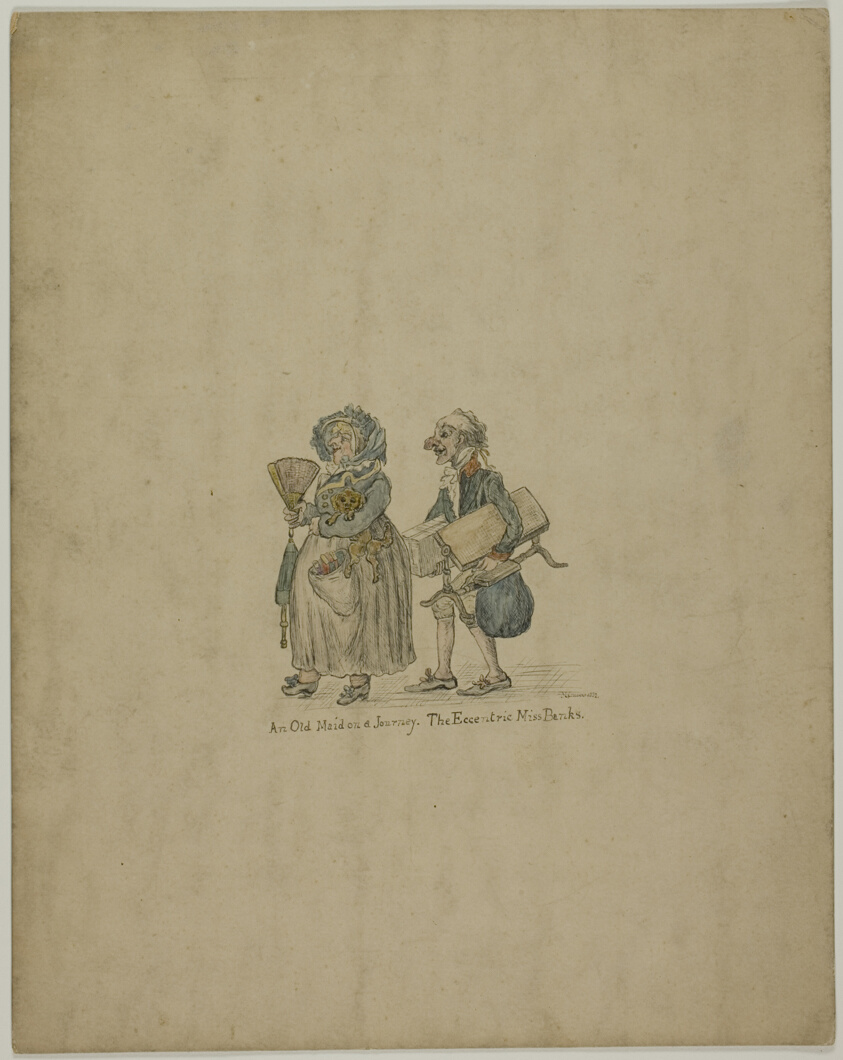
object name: Drawing and Watercolor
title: An Old Maid on a Journey - The Eccentric Miss Banks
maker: M. Chevers (British, n.d.)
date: 1882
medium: Pen and black ink, with brush and watercolor, on tan wove card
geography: United Kingdom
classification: watercolor; drawings (visual works); prints and drawing